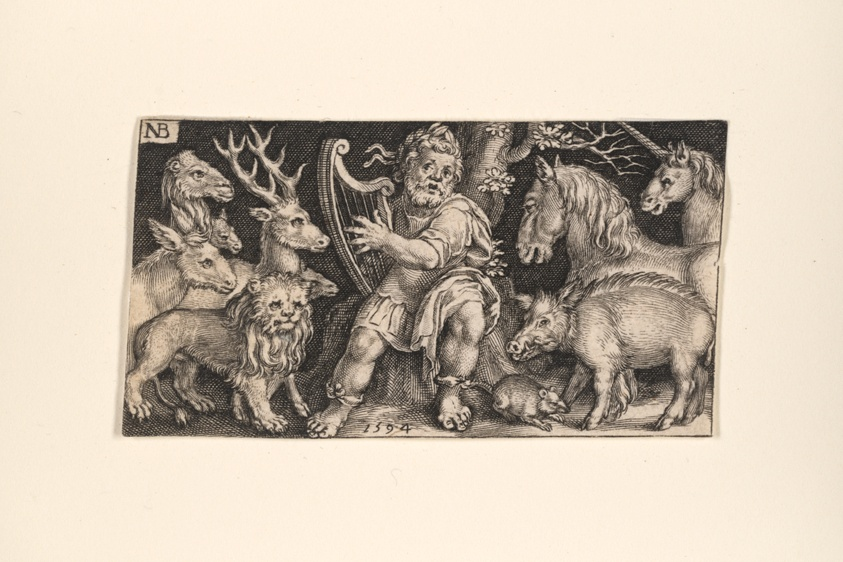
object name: Print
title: Orpheus from Fighting Chimeras and Scenes from Aesop's Fables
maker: Nicolaes de Bruyn (Flemish, 1571–1656)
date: 1594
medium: Engraving on paper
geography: Flanders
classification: engraving; paper; print; prints and drawing